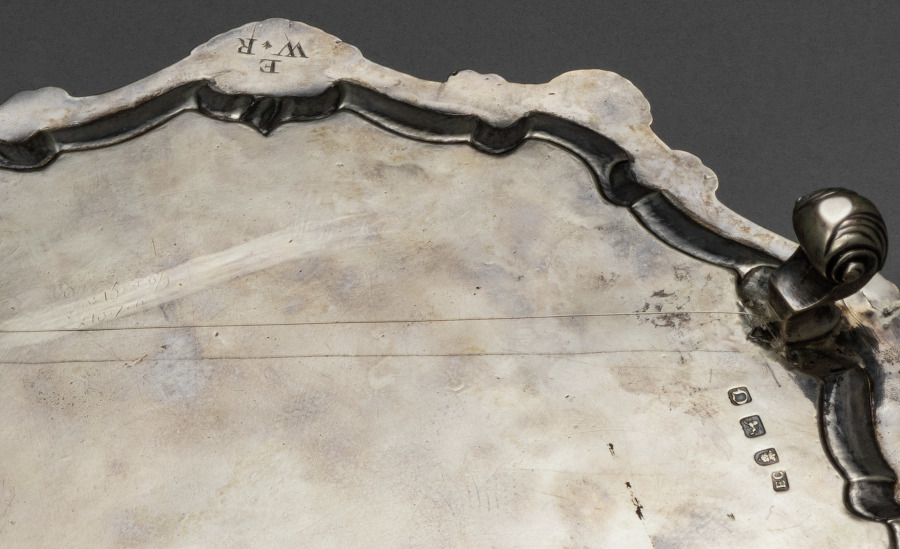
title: Salver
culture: England, 18th century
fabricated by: Ebenezer Coker (British)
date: 1769–1770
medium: silver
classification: Silver